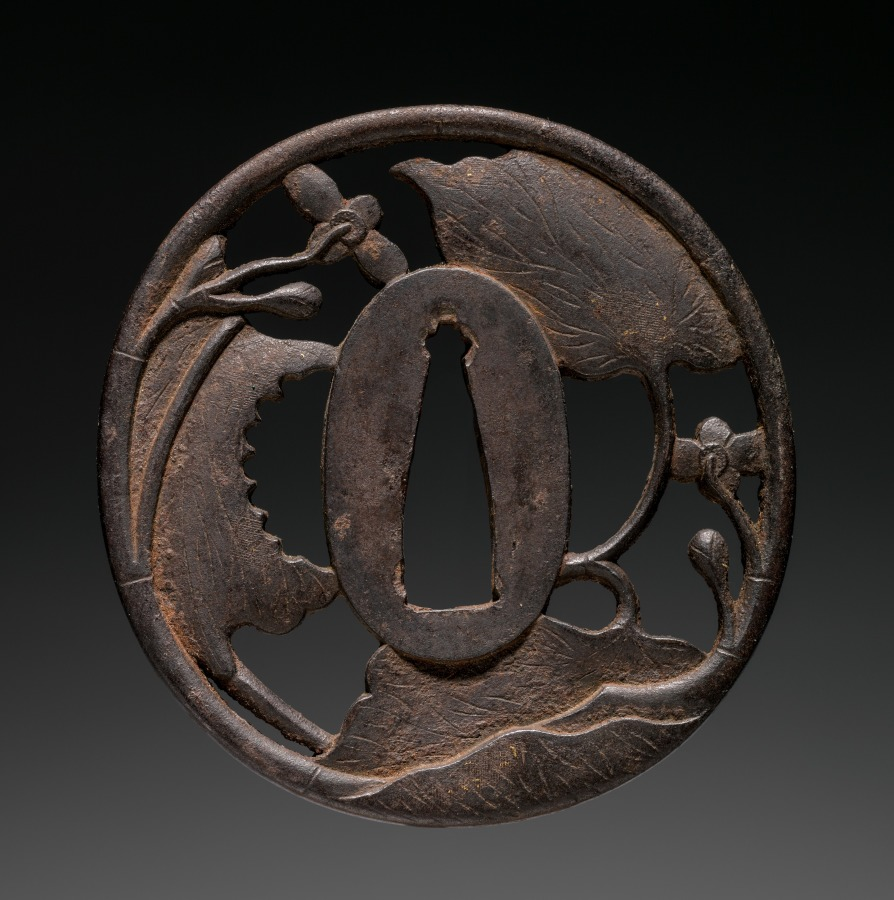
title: Sword Guard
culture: Japan, Edo period (1615–1868)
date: c. 1800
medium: iron (Chosu type)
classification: Arms and Armor